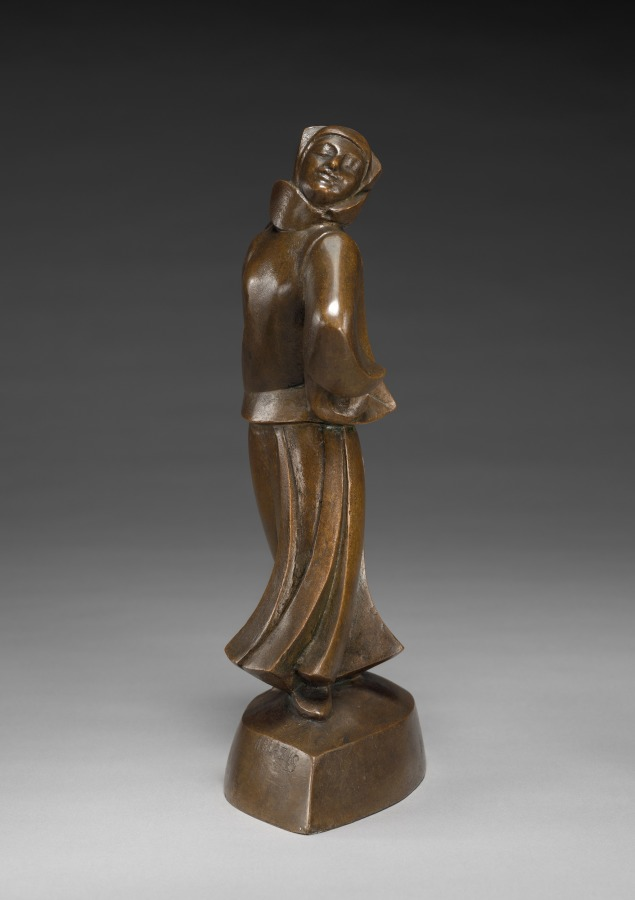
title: Russian Dancer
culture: America, Ohio, Cleveland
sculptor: Alexander Blazys (American, born Russian Empire [now Lithuania], 1894–1963)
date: 1925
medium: bronze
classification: Sculpture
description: A Lithuanian immigrant, Blazys introduced modernist sculpture to Cleveland upon his arrival in 1925. These figures merge rhythmic movement inspired by music with faceted, geometric planes derived from Cubism.